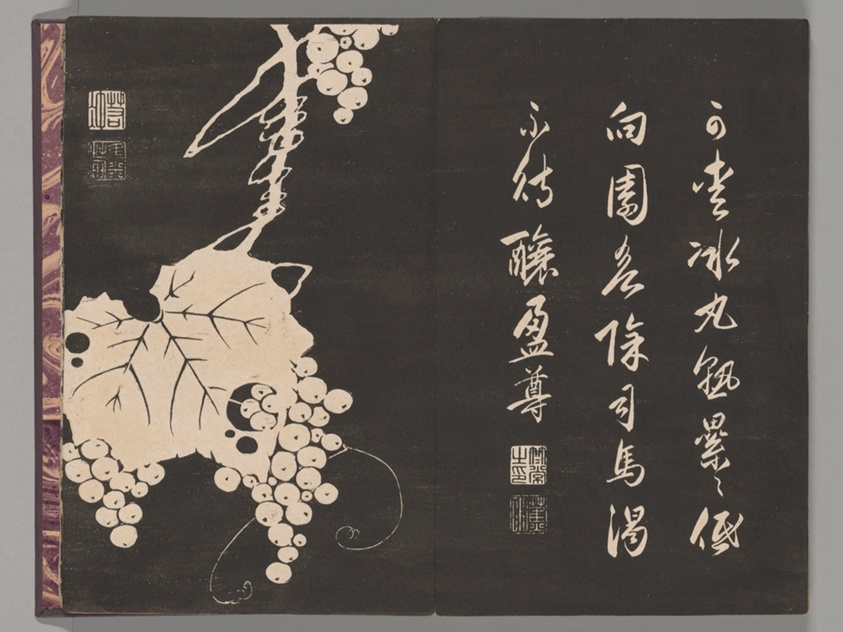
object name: Book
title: Soken sekisatsu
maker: Ito Jakuchu (Japanese, 1716-1800)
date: 1767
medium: Woodblock printed book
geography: Japan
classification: book